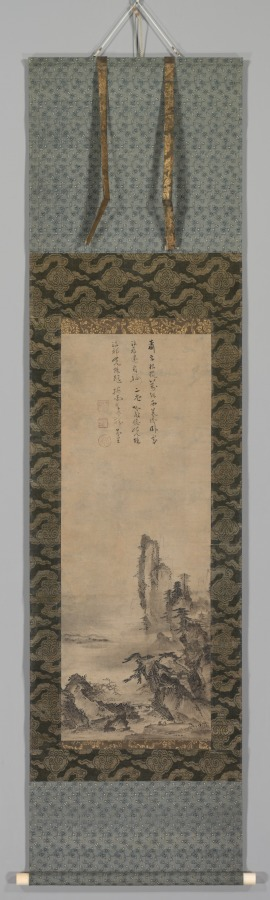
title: Lonely Temple and Towering Cliff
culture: Japan, Muromachi period (1392–1573)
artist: circle of Kenkō Shōkei (Japanese, active 1478–1506)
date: c. 1480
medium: hanging scroll; ink and slight color on paper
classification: Painting